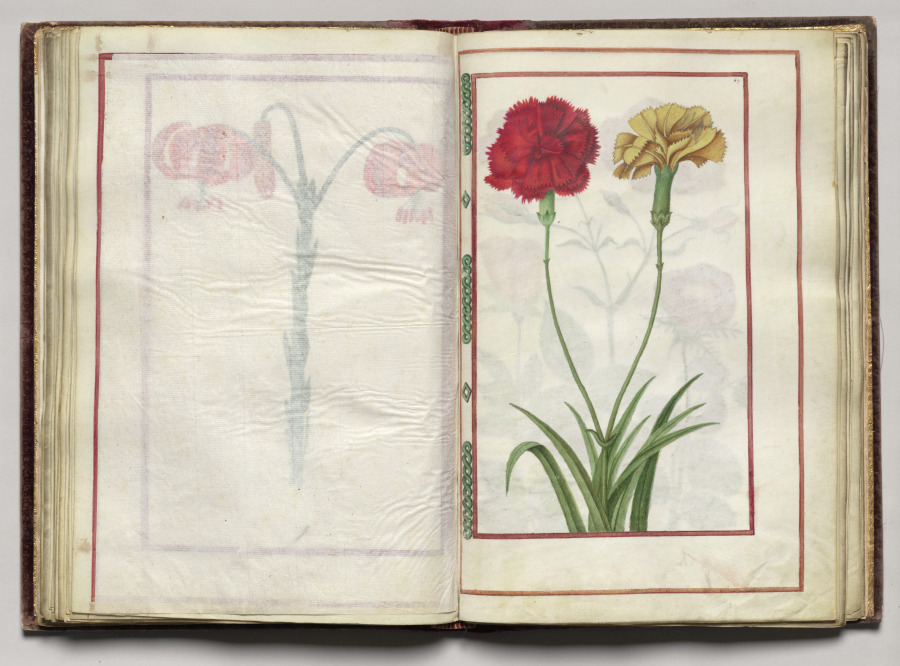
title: Red and Yellow Carnations, folio 33 (recto), from Florilegium (A Book of Flower Studies)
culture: France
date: 1608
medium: watercolor, ink, silver, and gold over occasional traces of pencil, on vellum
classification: Bound Volume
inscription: Dated: Poitiers 1608 (on frontispiece) Signed: On frontispiece in black ink, lower right: Van Kuyk Notation on drawing: Frontispiece: in pencil, lower margin: * élève de Van Kessel, peintre flammand (* in pencil also appears in front of Van Kuyk's name).